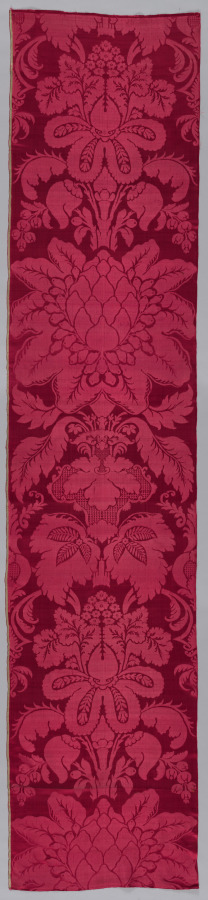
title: Two Large Damask Cloths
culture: Italy, 17th century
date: 1600s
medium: damask, silk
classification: Textile